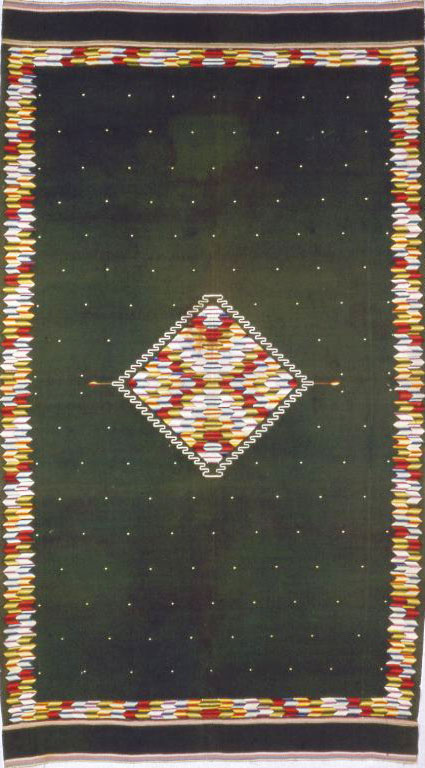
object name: Textile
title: Sarape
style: Folk Art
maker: Mexico, possibly Saltillo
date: 1850/1900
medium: Cotton and wool, slit tapestry weave with warp fringe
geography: Mexico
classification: textile; weaving